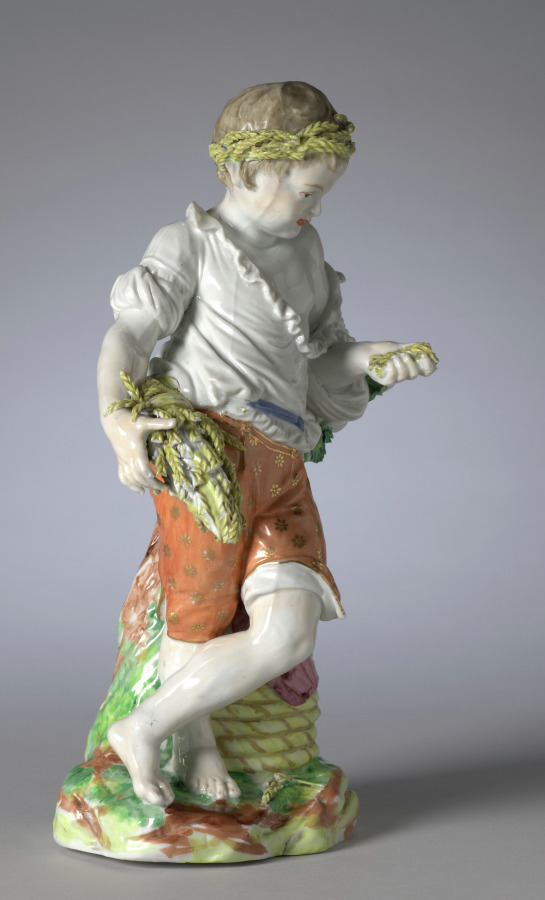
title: Figure of Summer from the Four Seasons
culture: England, Bristol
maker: Bristol Porcelain Factory (British, 1770–81)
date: c. 1775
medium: hard-paste porcelain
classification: Ceramic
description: The modern notion of childhood as a time of innocence and simplicity emerged during the second half of the eighteenth century. This understanding of adolescence led to numerous depictions of children as personifications of the four seasons. Here summer is portrayed as a young boy holding a sheaf of wheat as he leans against the beehive next to him. Both grain and honey have been associated with summer harvests and their accompanying festivals since antiquity.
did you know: Allegorical figures most often decorated a table during the dessert course, providing amusing subjects for conversation.